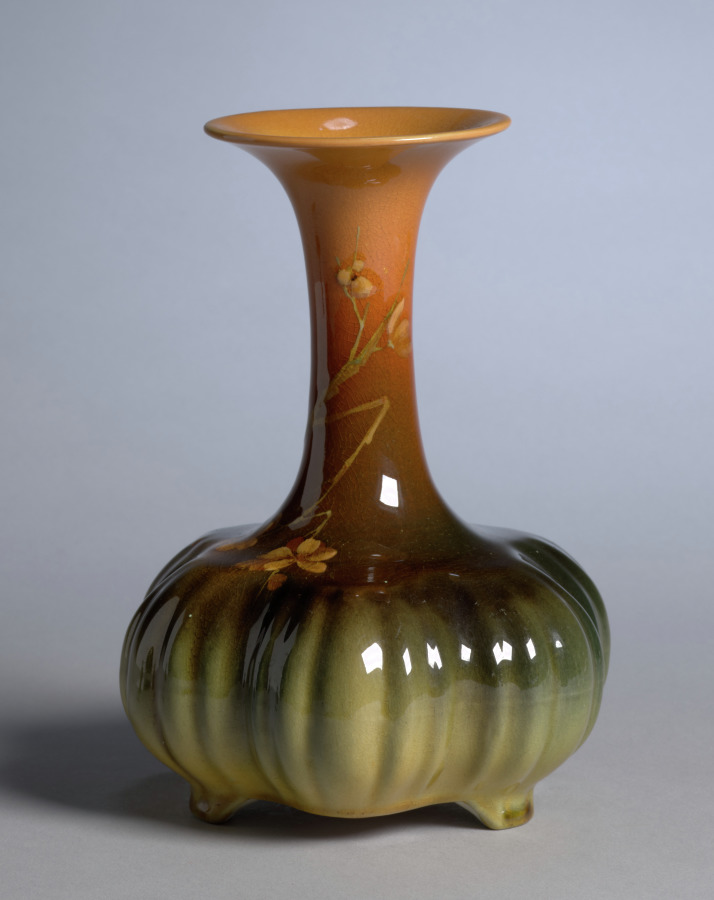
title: Vase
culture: America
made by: Rookwood Pottery Company (American, established 1880)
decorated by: possibly by Constance Amelia Baker (American)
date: 1890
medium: earthenware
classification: Ceramic